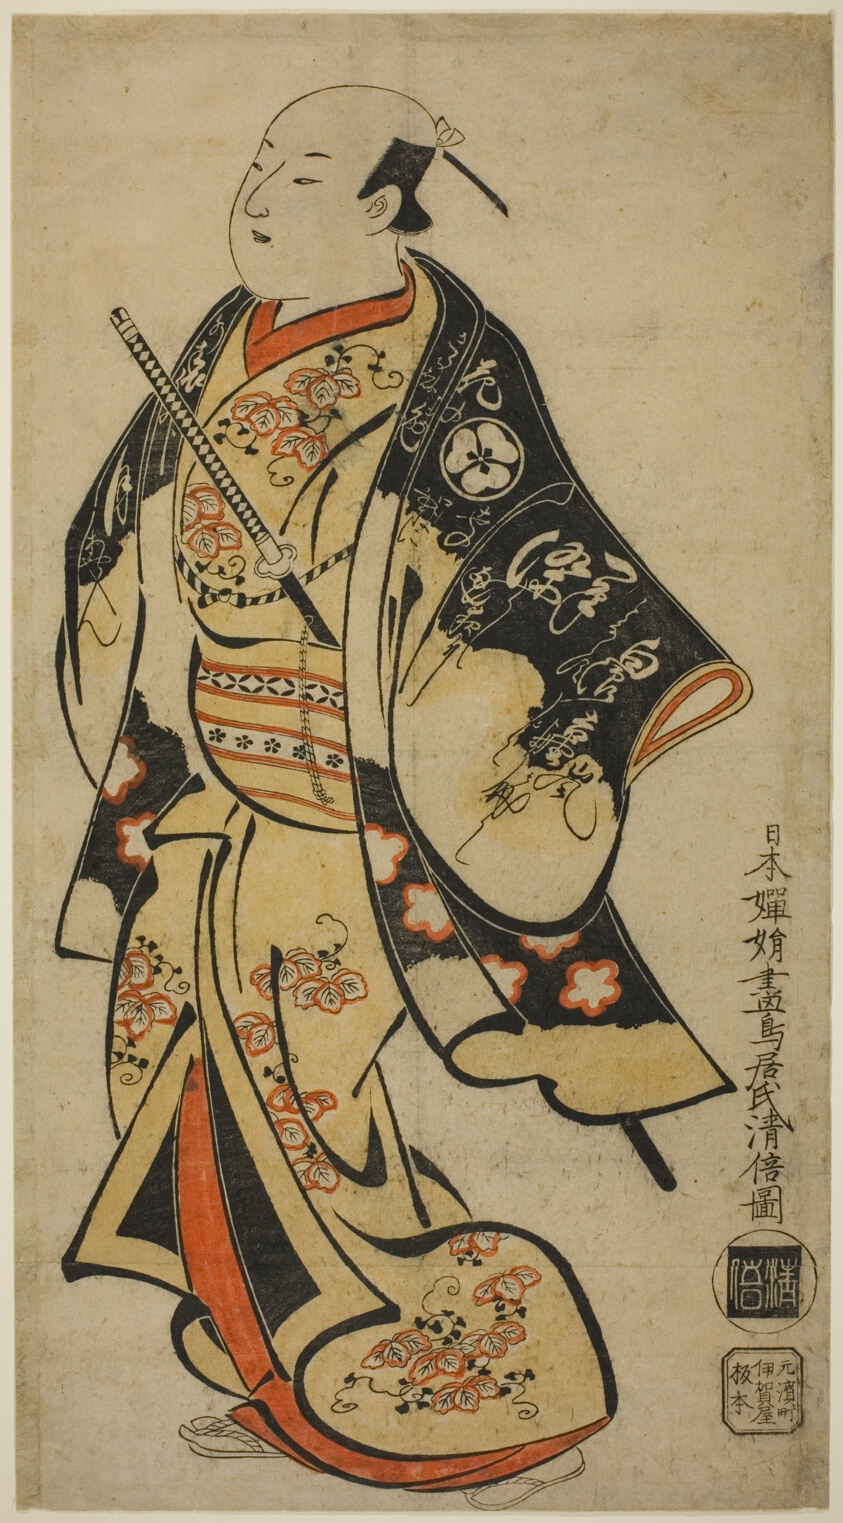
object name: Print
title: The Actor Uemura Kaemon (?)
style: Japanese (culture or style)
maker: Torii Kiyomasu I (Japanese, active c. 1704–18 (?))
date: c. 1706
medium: Hand-colored woodblock print; o-oban, tan-e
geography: Japan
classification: woodblock print; print; asian art